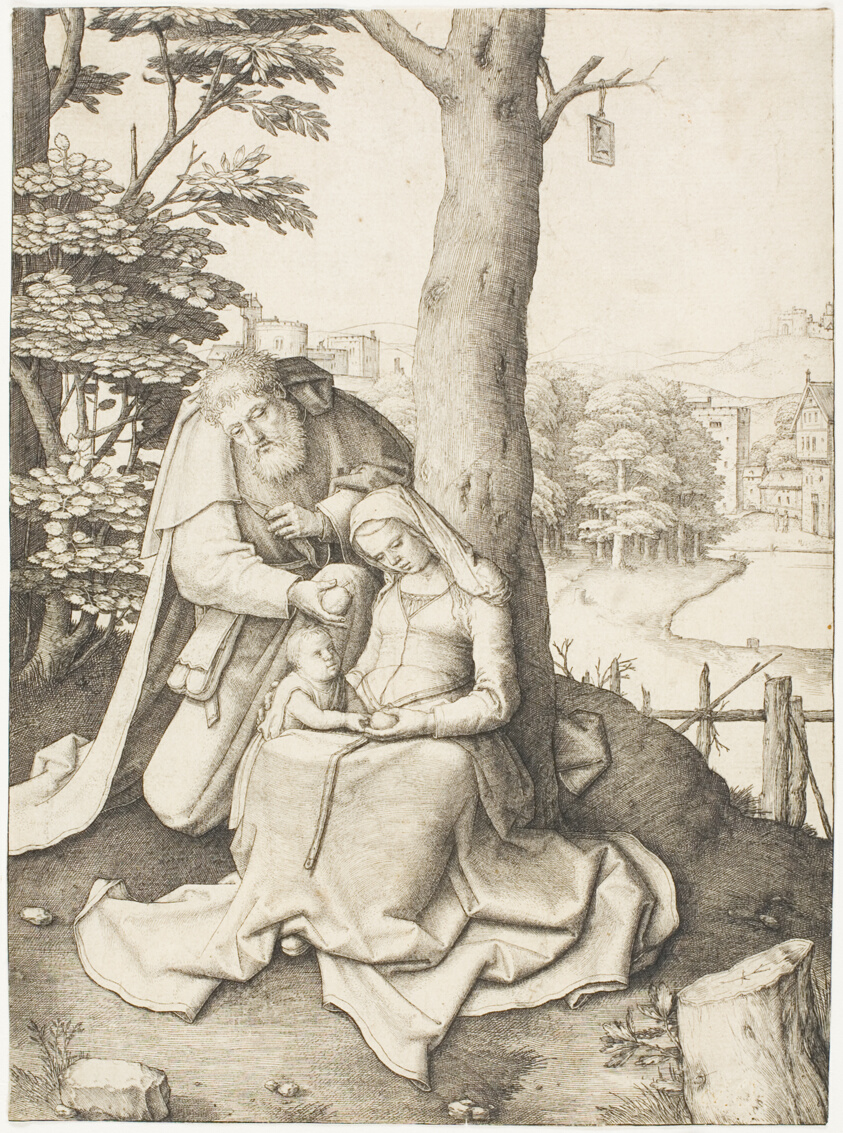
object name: Print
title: The Holy Family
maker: Lucas van Leyden (Netherlandish, c. 1494-1533)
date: c. 1508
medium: Engraving in black on ivory laid paper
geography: Netherlands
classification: engraving; print; prints and drawing